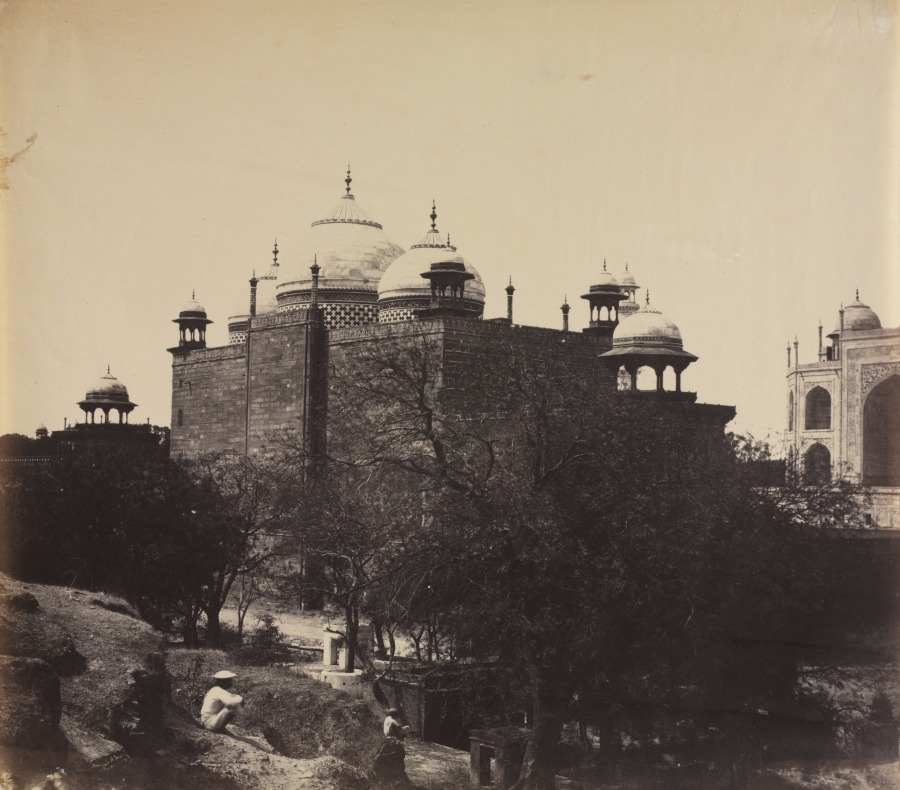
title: Taj Mahal, Back View of the Rest-House, with Figure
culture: England, 19th century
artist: Dr. John Murray (Scottish, 1809–1898)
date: c. 1858–1862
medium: wax paper negative and albumen print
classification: Photograph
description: Although Dr. John Murray enjoyed a distinguished medical career as a surgeon, administrator, and leader in the fight against cholera, he is now best known for his superb paper negative photographs of India. Having lived near the Taj Mahal in the city of Agra for 20 years, Dr. Murray took great interest in the monument, photographing it from numerous perspectives and under varying light conditions. In this print, he chose an elevated viewpoint to compose an intriguing rendering of the Rest-House. The paper negative was waxed before sensitizing, improving its translucency and allowing the photographer to render his architectural subject matter in broad areas of light and dark, emphasizing the building's bold geometric forms. The surrounding, picturesque landscape adds both visual interest and complexity to the composition. Seated figures in the foreground provide an indication of scale and the sense of wonder that might be experienced in the presence of this vast monument.